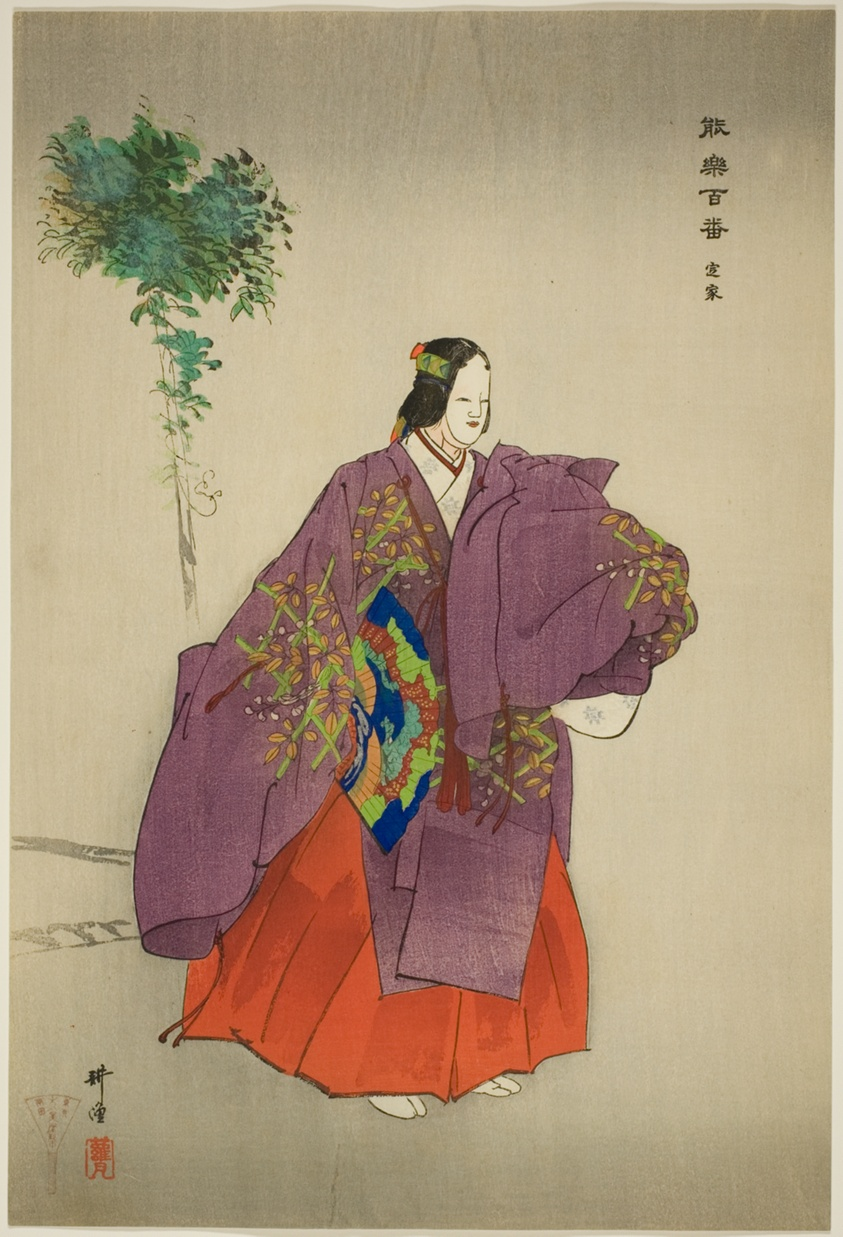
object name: Print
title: Teika, from the series "One Hundred No Dramas (Nogaku hyakuban)"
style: Japanese (culture or style)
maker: Tsukioka Kogyo; Japanese, 1869-1927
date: 1898/1903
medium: Color woodblock print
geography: Japan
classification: woodblock print; print; asian art